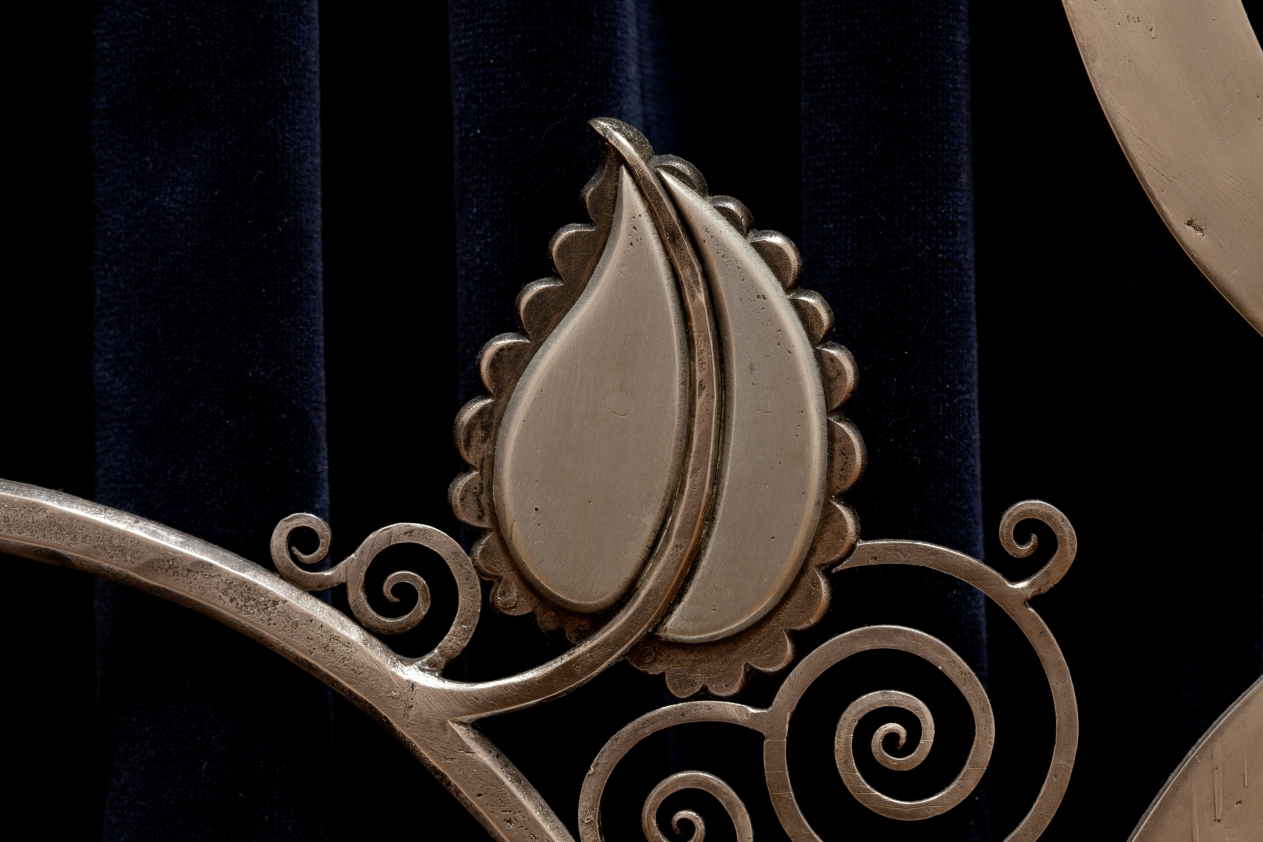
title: Muse with Violin Screen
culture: America, Ohio, Cleveland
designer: Paul Fehér (American, born Hungary, 1898–1990)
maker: Rose Iron Works (America, Ohio, Cleveland, est. 1904)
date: 1930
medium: Steel, brass; silver and gold plating, cotton velveteen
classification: Metalwork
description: Since the early years of the 20th century, the Rose Iron Works, a Cleveland supplier of architectural ornament, has produced distinguished metalwork. The company’s founder, Martin Rose, was born in Austria-Hungary and studied ornamental metalsmithing in Vienna prior to immigrating to Cleveland in 1902. In the 1920s, he hired a talented young Parisian designer, Paul Fehér, to work for the firm. Fehér’s designs, culminating in this massive screen, brought a modern European sensibility to the Rose Iron Works production. With its geometric patterning, highly stylized and abstracted natural forms, and the central figure reminiscent of the celebrated jazz singer Josephine Baker, this screen reflects the classic motifs of Art Deco design.